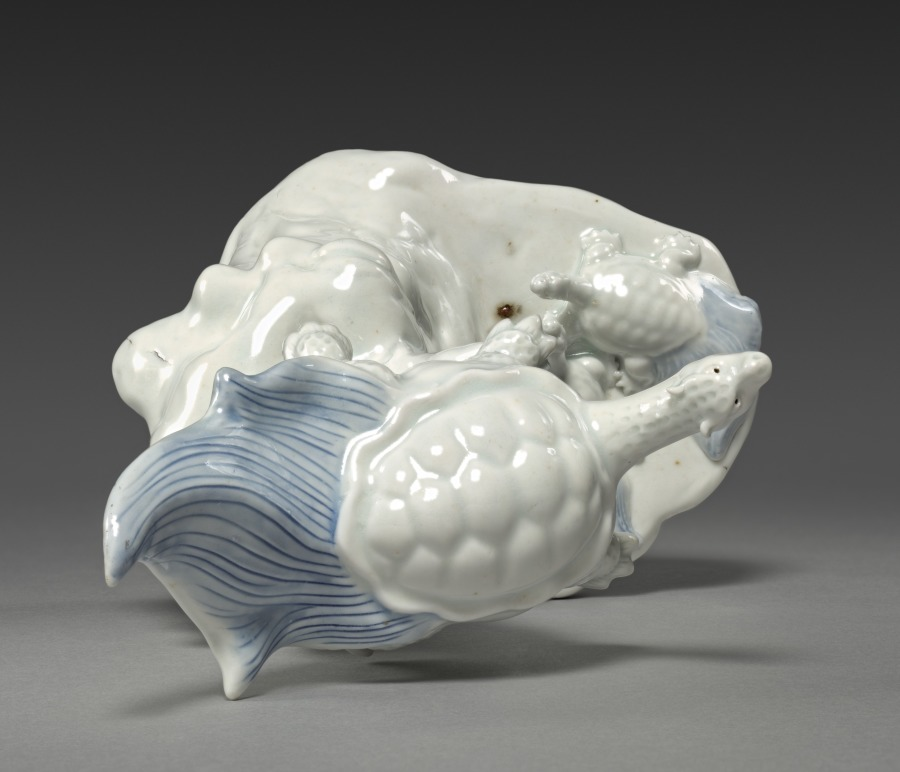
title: Tortoises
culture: Japan, Edo period (1615–1868)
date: early to mid-1800s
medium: porcelain, molded and carved, with underglaze blue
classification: Ceramic